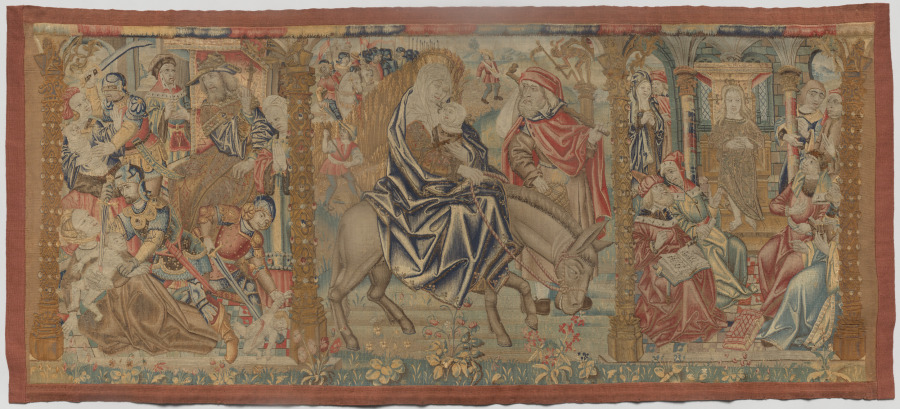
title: Altar Frontal: Scenes from the Childhood of Christ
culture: France and South Netherlands, 1500s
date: c. 1500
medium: Wool, silk, gold thread; tapestry weave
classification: Tapestry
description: Pictorial tapestries were symbols of wealth and more highly prized than paintings. Small tapestries with Christian imagery were frequently commissioned to embellish the fronts of altars. This example displays the Massacre of the Innocents, the Flight into Egypt, and Christ among the Doctors. Tapestry weave is ideal for creating narrative scenes. The technique can be compared to painting, as each colored weft (horizontal thread) is interlaced with warps (vertical thread) where needed for the pattern. As expensive investments, tapestries have the advantage of being portable and easily stored and displayed.